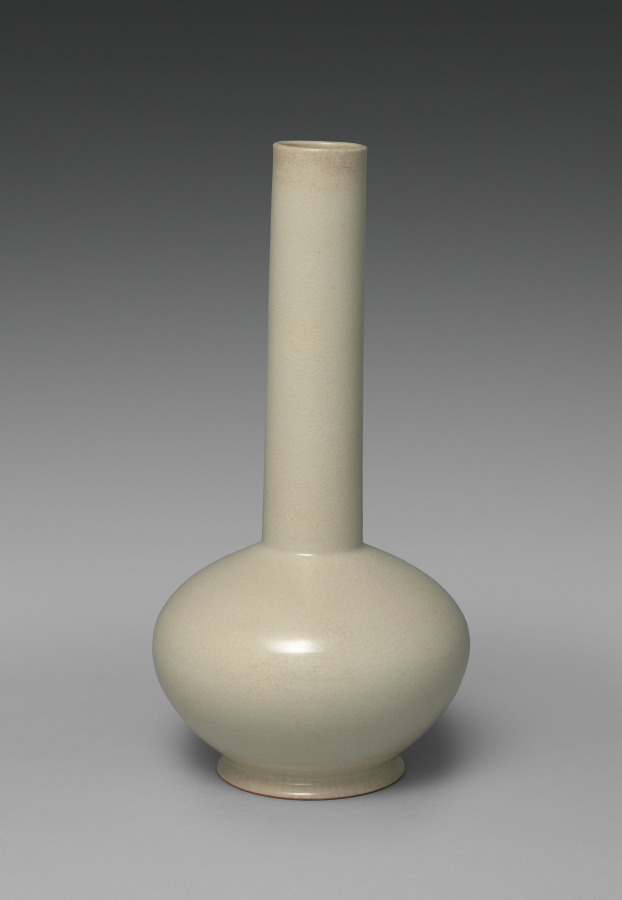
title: Long-Necked Vase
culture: Japan, Meiji period (1868–1912)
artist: Seifū Yohei III (Japanese, 1851–1914)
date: 1893–97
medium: Stoneware with crackled glaze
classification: Ceramic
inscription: 大日本清風造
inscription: 帝室技芸員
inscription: 清風盧人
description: The glazing of this long, narrow-necked and bulbous-based vase has a network of shallow cracks, created when the glaze fractured as it cooled from firing. It is called a cracked-ice pattern or glaze, since the effect resembles the surface of a frozen lake. The cracks here are of a consistently high density throughout the vessel. This pattern is observed also in the transparent glaze of some Kyoto ware, in some of Yohei III’s green glazes, and in some of his vessels emulating Chinese forms. The interior of the box lid has an attestation to its authenticity by Yohei IV, and the footring is inscribed Seifū of Great Japan (Dai Nihon Seifū) in iron black.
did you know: Seifū Yohei III apprenticed in the Seifū studio, married into the family, and later adopted the Seifū Yohei name, when he became head of the studio.